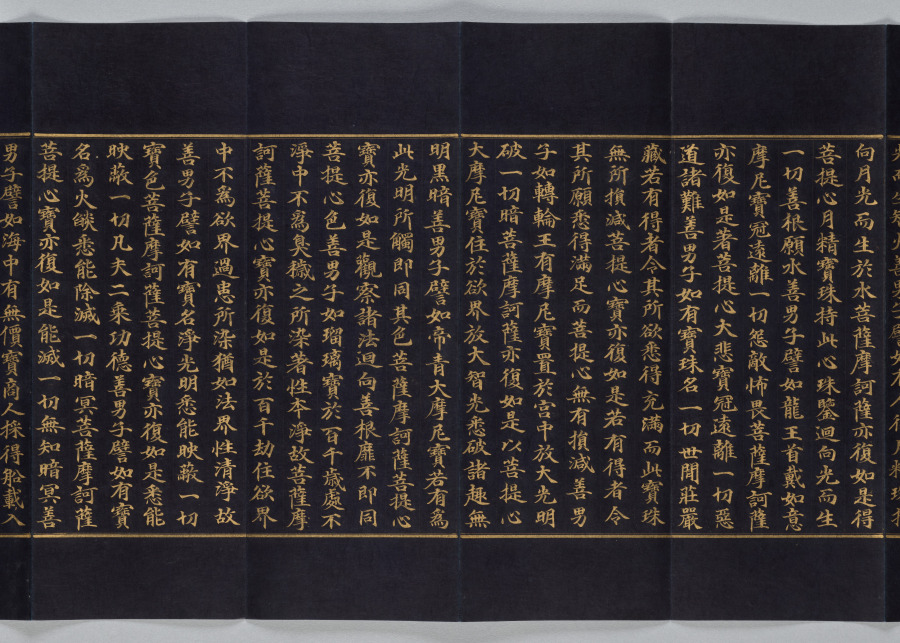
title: Avatamsaka Sutra No. 78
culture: Korea, Goryeo dynasty (918–1392)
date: 1300s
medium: Folded book with illustrated frontispiece; gold and silver on mulberry paper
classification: Bound Volume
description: This illuminated manuscript presents one part of the multivolume sacred text titled Avatamsaka (Flower Garland) sutra. Both the script and the image are rendered in gold ink on the smooth surface of the dark blue, indigo-dyed mulberry paper. This portion of the text, which reads from right to left, describes the encounter of the Buddha of the Future (Maitreya) and the young pilgrim Sudhana. The Buddha gives his words of wisdom to Sudhana, who asks questions about the path toward spiritual awakening. Mixed with ink and glue, the gold has a brilliance that strikingly reflects Sudhana’s ardent quest for understanding the way to reach enlightenment.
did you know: The pristine condition of this manuscript indicates that it was rarely used after its creation, revealing that the act of making a manuscript rather than reading it was the main religious goal.